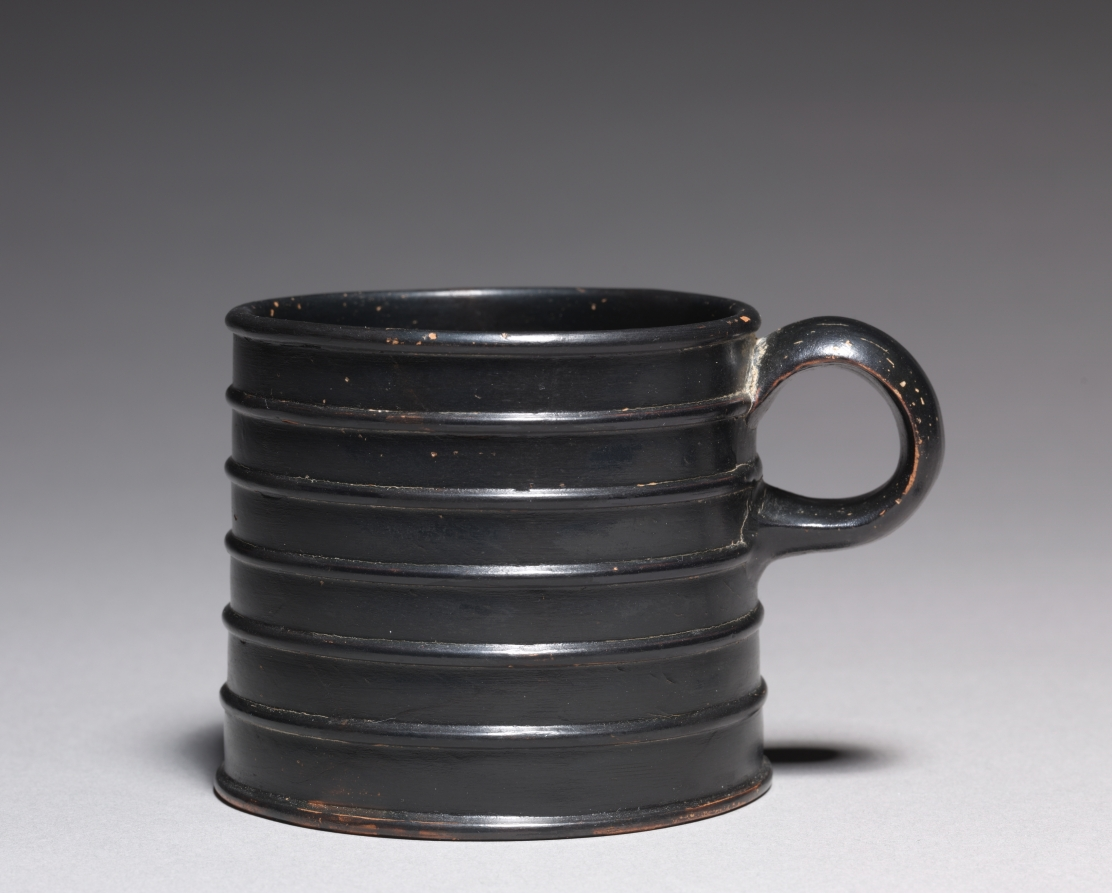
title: Black-Gloss Mug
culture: South Italian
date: late 400s–300s BCE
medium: ceramic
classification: Ceramic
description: Nearly cylindrical with a vertical ring handle, this vessel looks like a modern cup for tea or coffee—drinks not known in the classical world. Although the shape is unusual for an ancient drinking vessel, other examples exist, and the manufacture is typical. Turned on a wheel, the cup has a flat base and seven applied fillets adorning the exterior. Its black-gloss coating derives from the same firing technology used for black-figure and red-figure decoration.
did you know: The black-gloss finish of this mug derives from fired clay slip, not black pigment.